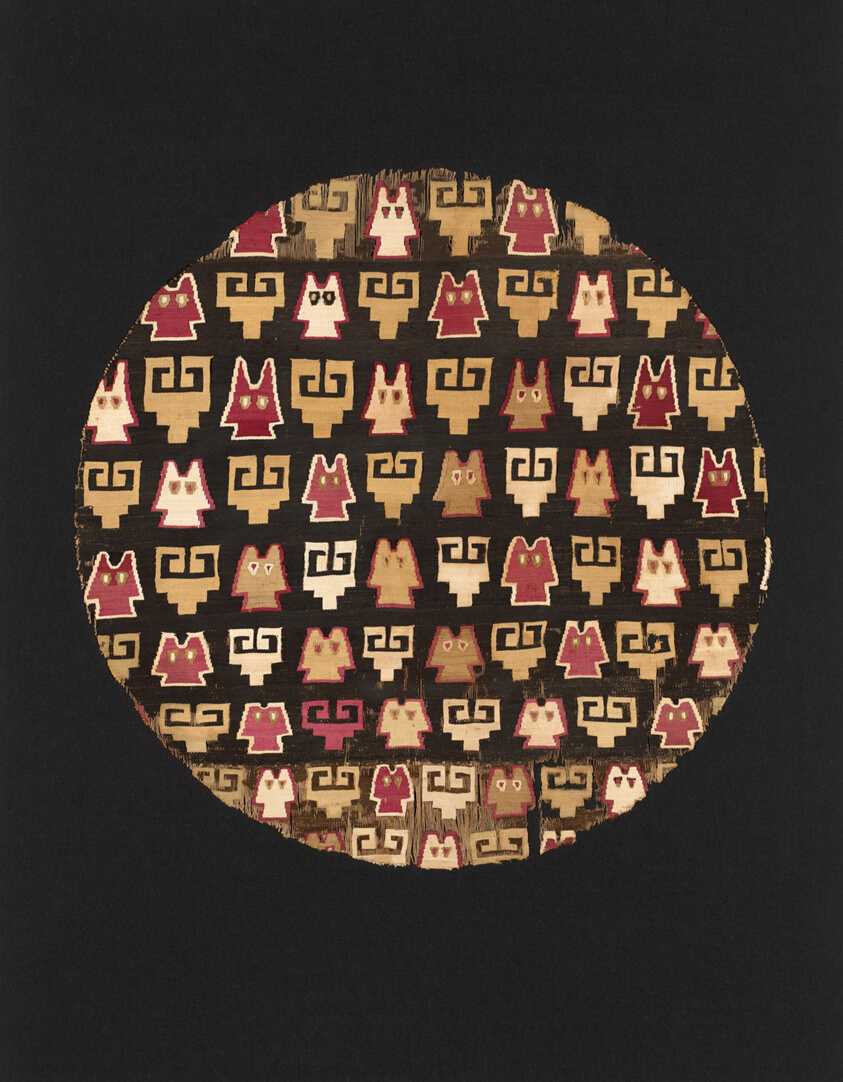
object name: Textile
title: Fragment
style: peruvian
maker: Peru, Probably north or central coast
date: A.D. 1000/1476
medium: Cotton and wool (camelid), slit tapestry weave with eccentric wefts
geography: Peru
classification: weaving; textile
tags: fish, animals, abstract shapes, stepped motif